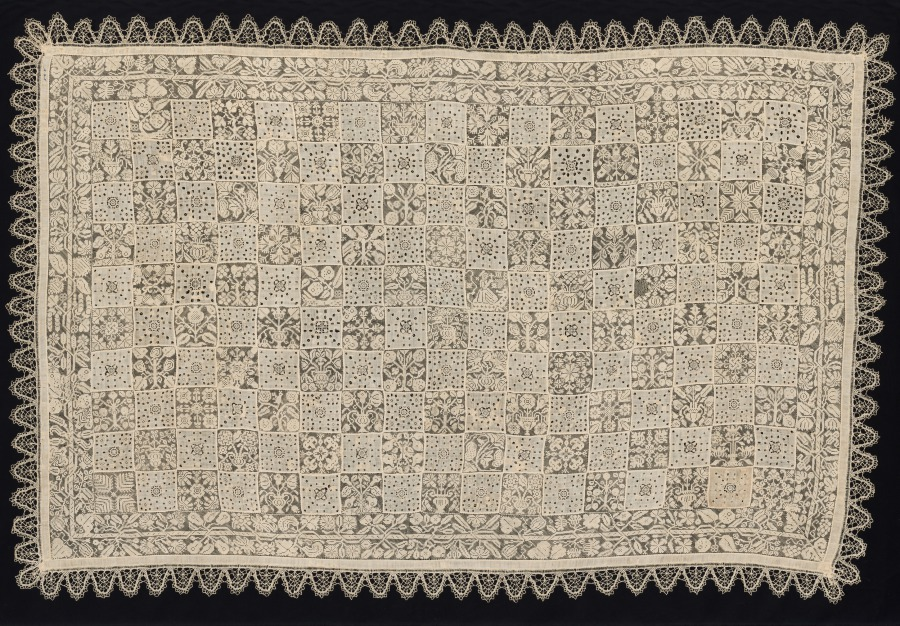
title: Cloth with One Figure of a Woman Carrying a Cross Surrounded by Floral and Vegetal Patterns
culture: Italy, 1700s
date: 1700s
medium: Bleached linen (est.): needle lace, filet/lacis (knotted ground and darned in two directions), alternating reticella squares (open cutwork) and bobbin lace edging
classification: Lace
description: The only figure represented on this large lace cloth is located in the center. The figure is a woman, shown in profile, carrying a cross, standing on top of a creature or within a vessel shaped like a creature.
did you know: The large size and square shape suggest that this textile would likely have been used as a table cloth.